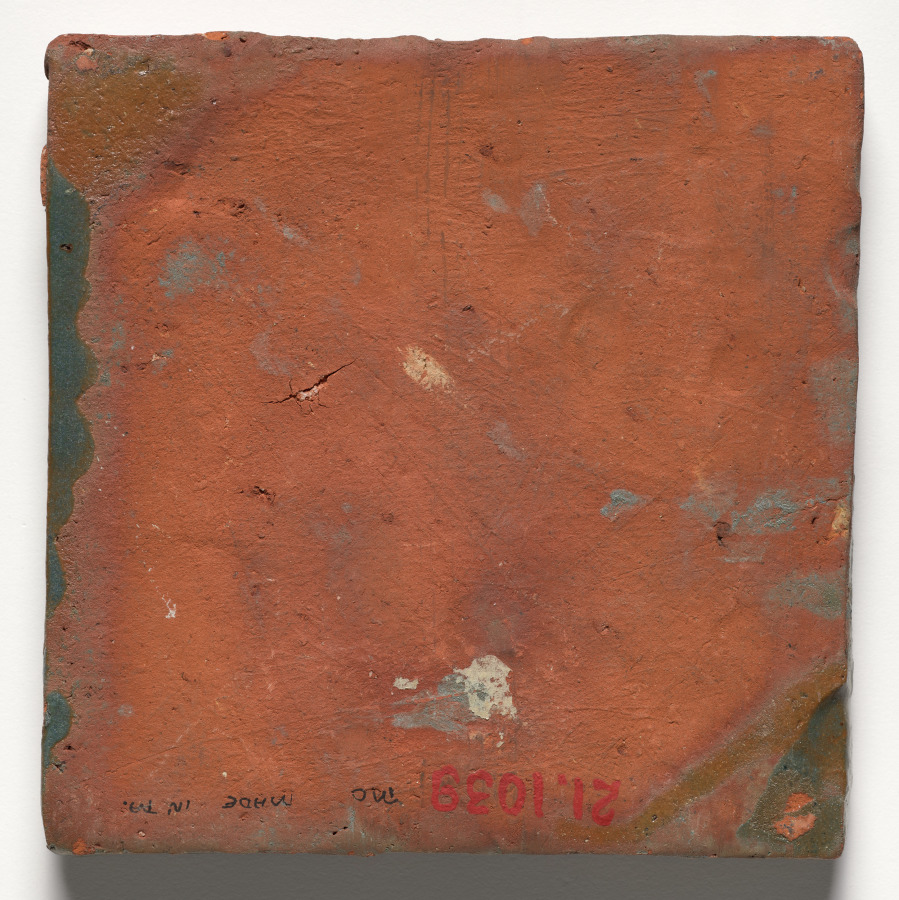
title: Tile- Islamic Pattern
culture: America, Pennsylvania, Doylestown, Early 20th century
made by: Moravian Pottery and Tile Works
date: before 1921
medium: glazed ceramic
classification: Ceramic